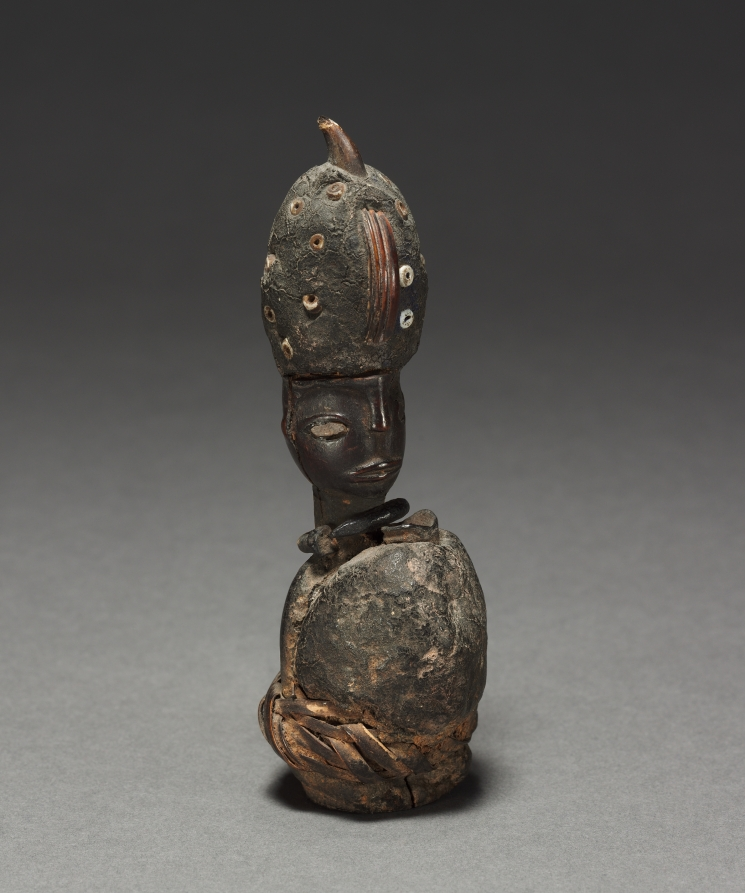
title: Power figure (nkisi)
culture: Central Africa, Republic of the Congo, Kongo people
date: late 1800s-early 1900s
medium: Wood, organic materials (including resin), iron, reed, tooth, seashell or glass beads, and possibly plastic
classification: Sculpture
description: One of seven anthropomorphic figurines, these minkisi contained medicines in which an ancestral spirit was believed to reside. Minkisi were objects of communal use; if conflict arose between two citizens, the Nkisi figure, along with the nganga (ritual leader) helped resolve the dispute. This small figure belonged to “the sorcerer of Loango,” chief of all sorcerers of that region (a province and port in West Central Africa).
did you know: This small figure belonged to “the sorcerer of Loango,” chief of all sorcerers of that region (a province and port in West Central Africa).